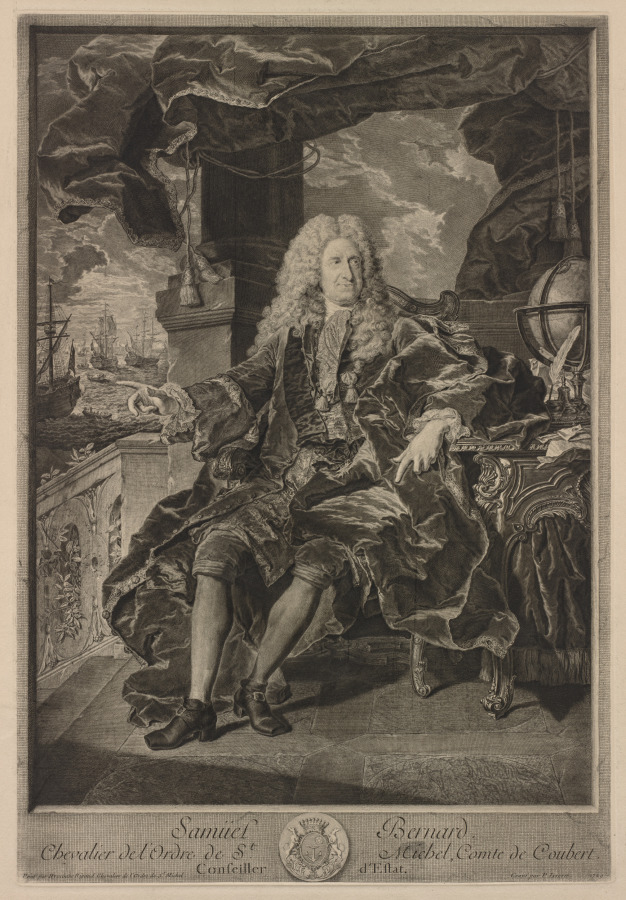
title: Samuel Bernard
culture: France, 17th-18th century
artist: Pierre Drevet (French, 1663–1738)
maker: after Hyacinthe Rigaud (French, 1659–1743)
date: 1729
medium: engraving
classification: Print